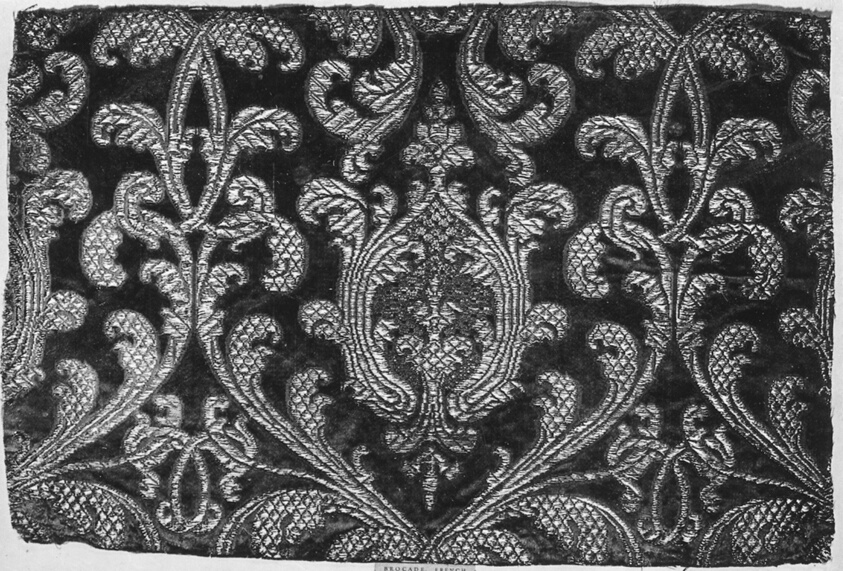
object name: Textile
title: Panel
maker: France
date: Late 17th century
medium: brocaded fancy compound satin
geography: France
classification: textile; weaving